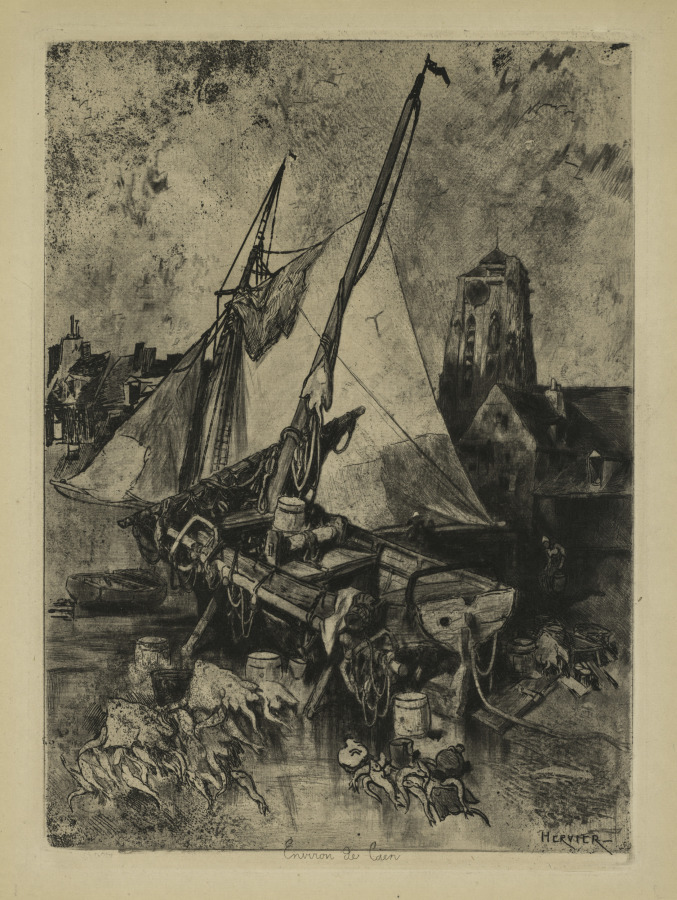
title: Fishing Boats, Normandy (Environ de Caen)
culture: France, 19th century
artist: Louis Adolphe Hervier (French, 1818–1879)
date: c. 1862–1864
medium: etching, roulette, drypoint and aquatint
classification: Print